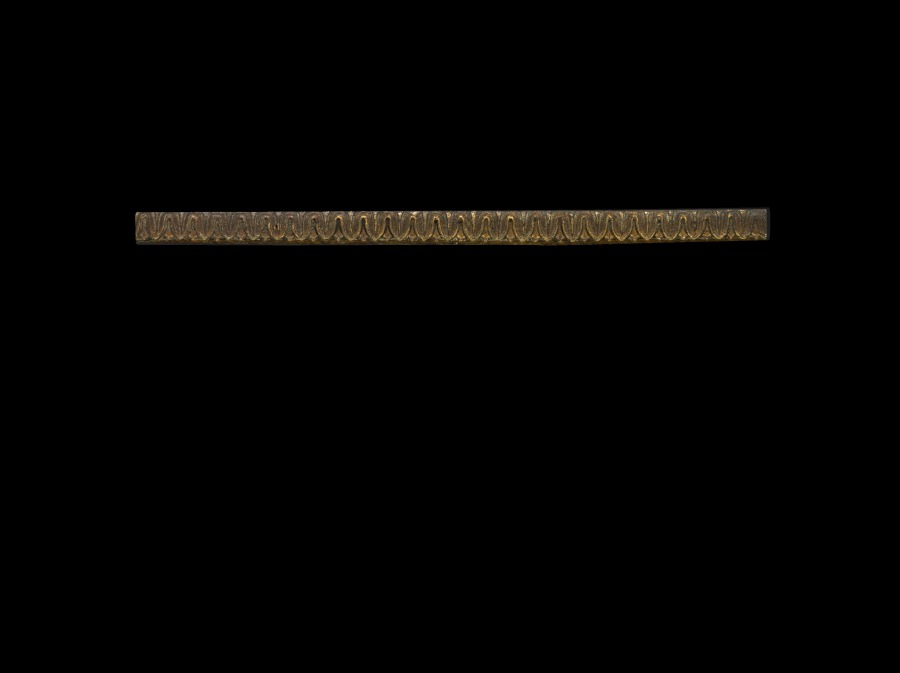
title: Ornamental Details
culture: France, late 18th century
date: late 1700s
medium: gilt bronze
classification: Metalwork